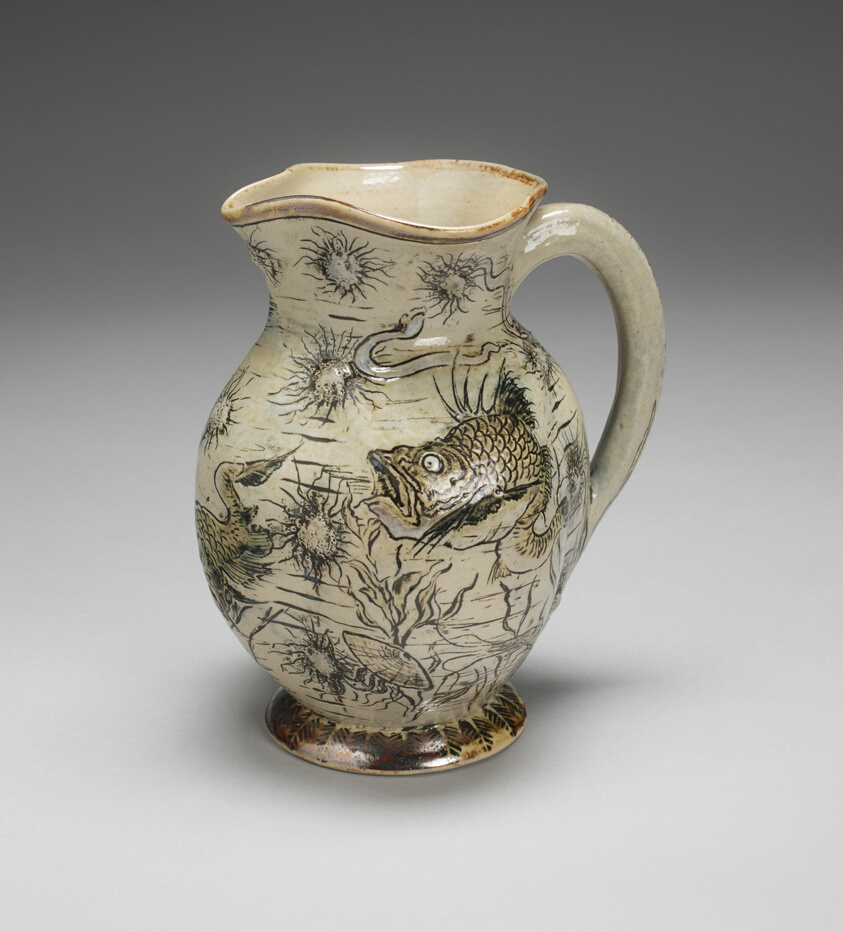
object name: Ceramics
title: Jug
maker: Martin Brothers (English, 1873-1914); London and Southall, England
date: 1890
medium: Salt-glazed stoneware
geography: England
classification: earthenware; european decorative arts; ceramics